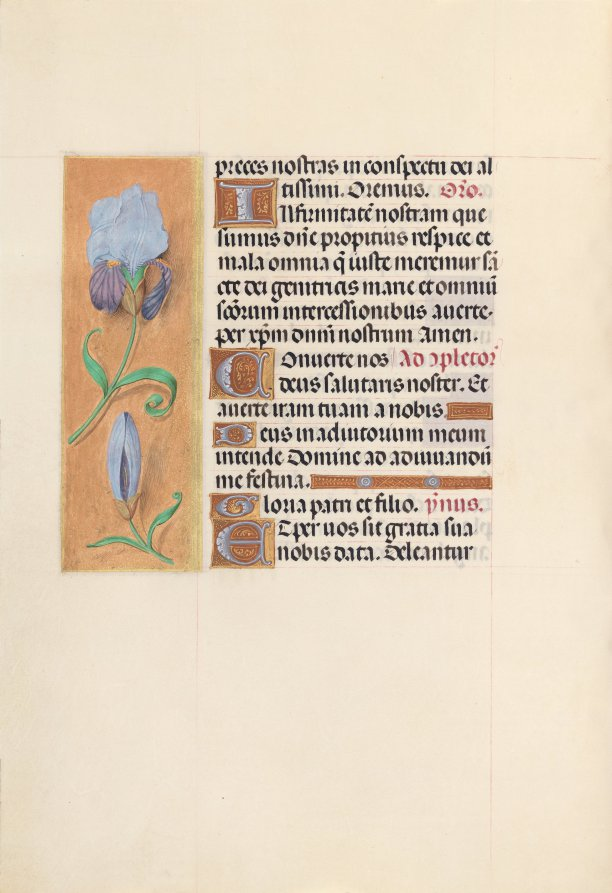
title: Hours of Queen Isabella the Catholic, Queen of Spain: Fol. 41v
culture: Flanders, Ghent and Bruges, late 15th century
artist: Master of the First Prayerbook of Maximillian (Flemish, c. 1444–1519)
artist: and Associates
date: c. 1500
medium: ink, tempera, and gold on vellum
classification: Bound Volume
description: This manuscript was illuminated by a circle of at least five highly organized manuscript painters active in the Flemish cities of Ghent and Bruges. The principal illuminator was Alexander Bening, who painted the majority of the book's miniatures. Manuscripts produced by this circle of artists are renowned for the decoration of their borders, which typically feature a rich variety of realistically-painted flowers, birds, and butterflies. This prayer book, called a book of hours, was intended not for a cleric, but for the private devotions of a lay person-in this case, Isabella the Catholic, Queen of Spain (1451-1504). Isabella's coat of arms embellishes the book's frontispiece. It is unlikely that the book was commissioned by the Queen herself; rather, she probably received it as a diplomatic gift from someone courting her patronage, perhaps Cardinal Francisco Jimenez de Cisneros. A Franciscan friar, Jimenez was dependent upon Isabella for his advancement, first to the post of Queen's confessor in 1492, and then to Archbishop of Toledo in 1495.